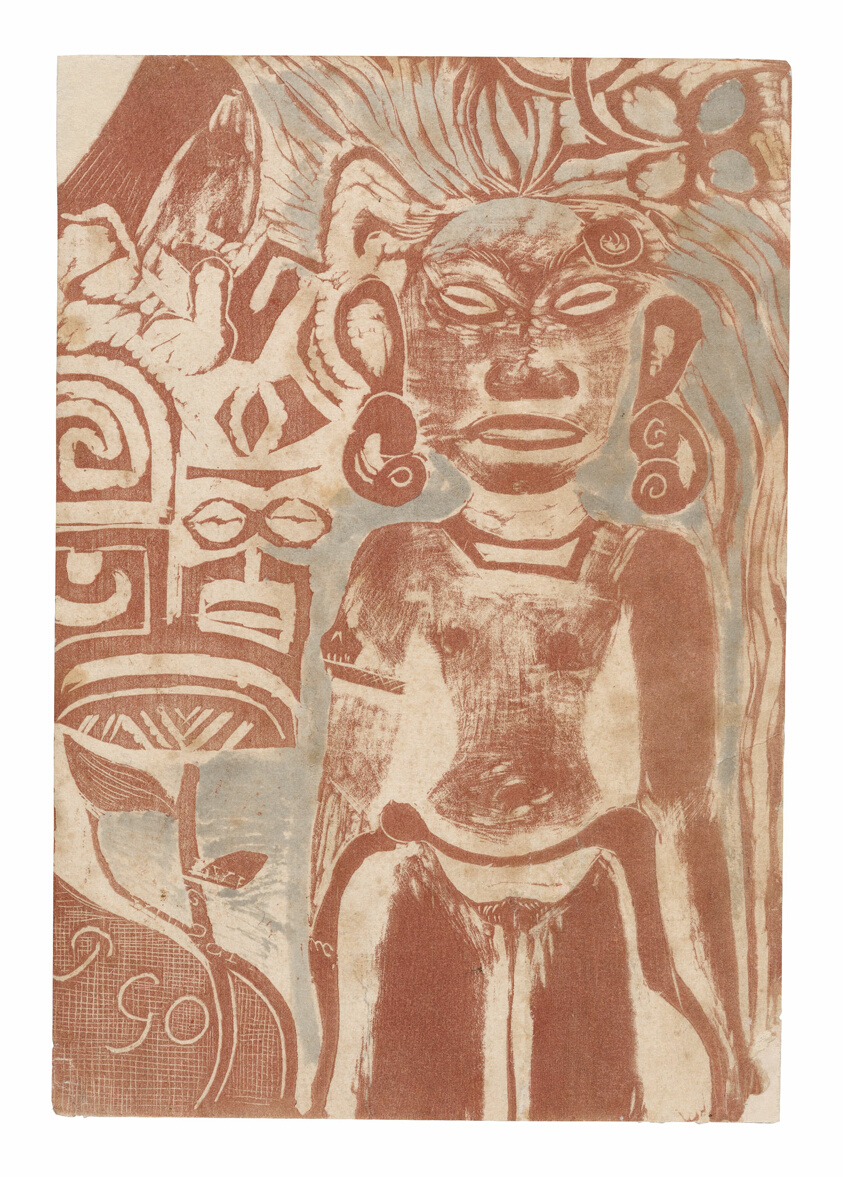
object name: Print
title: Tahitian Idol—the Goddess Hina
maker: Paul Gauguin (French, 1848-1903)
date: 1894/95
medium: Wood-block print in reddish-brown ink with blue-gray watercolor on ivory wove paper, laid down on ivory wove paper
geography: France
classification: woodcut; print; prints and drawing